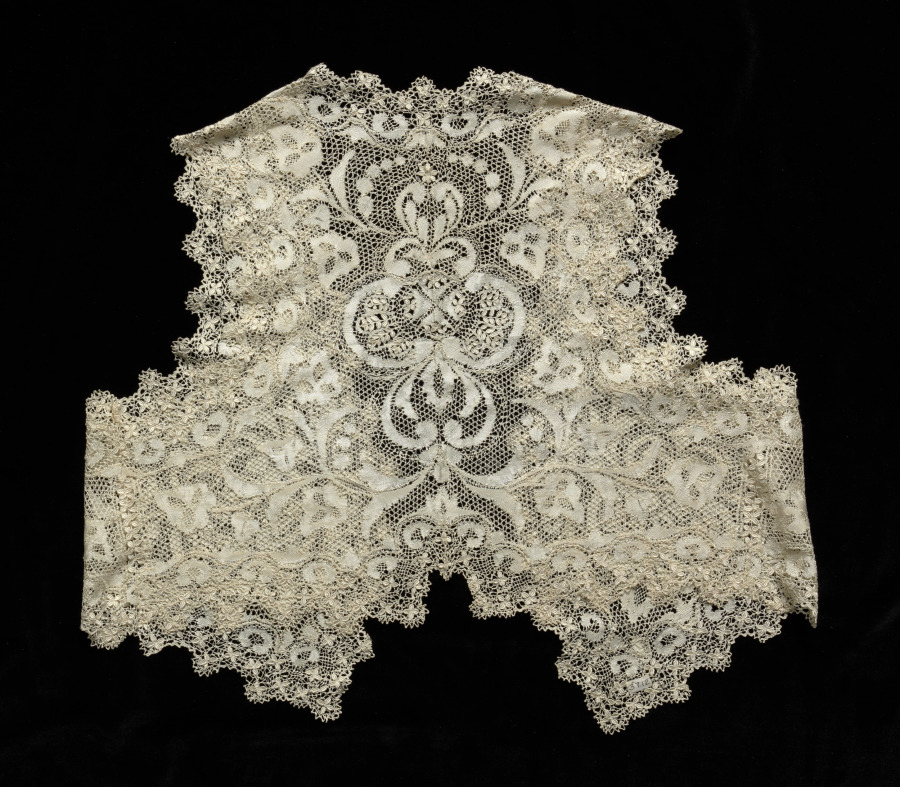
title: Bolero Style Lace Jacket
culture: Malta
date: 1800s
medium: Silk: bobbin lace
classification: Lace